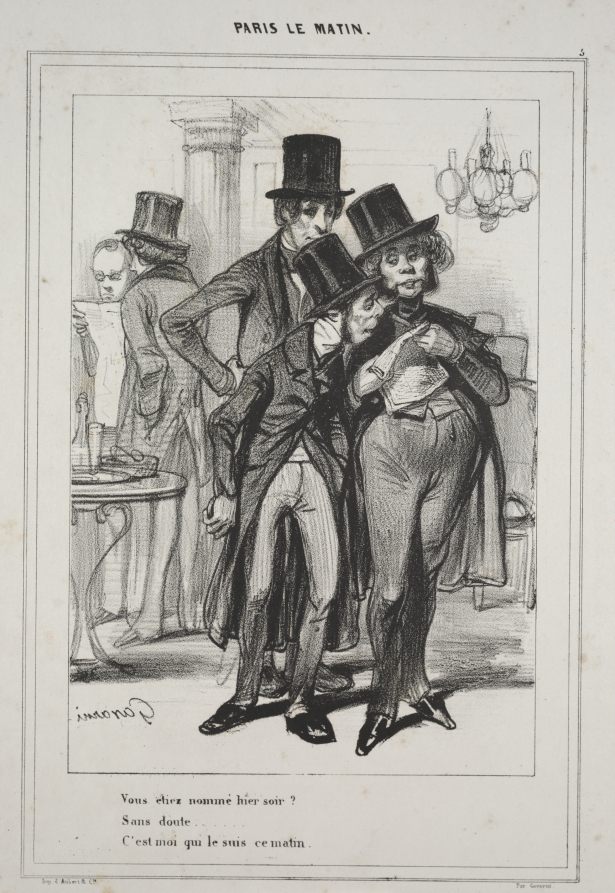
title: "Vous étiez nommé hier soir?...," from the series Paris Le Matin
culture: France, 19th century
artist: Paul Gavarni (French, 1804–1866)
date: 1839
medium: lithograph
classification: Print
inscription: signed in the image, reverse